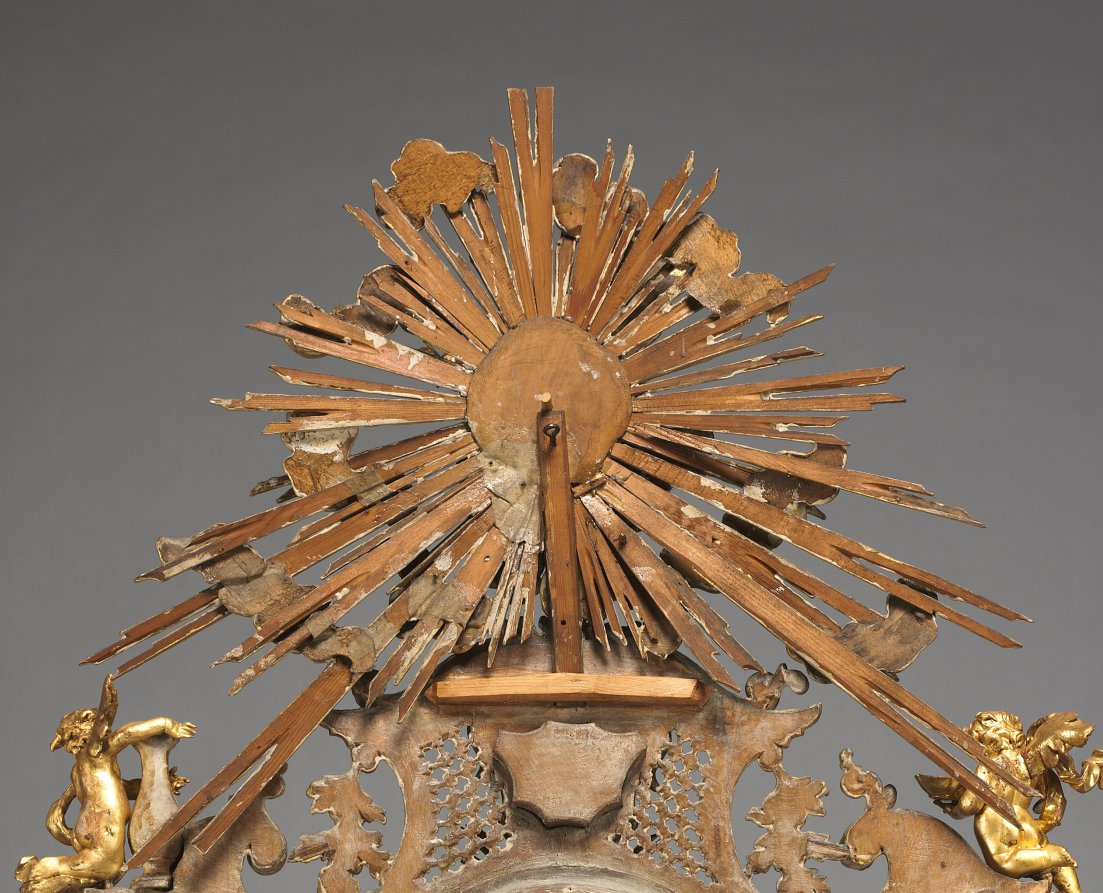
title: Altarpiece with Relics - God the Father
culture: Germany, Bavaria, 18th century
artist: Joseph Matthias Götz (German, 1696–1760)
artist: and Workshop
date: 1735–40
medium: gilded wood, with relics in niches: gilded wood, mother-of-pearl, ebony, red silk, gold wire, seed pearls, rock crystal, pen and ink on paper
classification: Sculpture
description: Götz covers every surface in gold leaf, giving each part of the object equal importance, rather than simply framing a central picture. In this distinctively Central European approach, figural narrative is subordinate to the overall ensemble. Götz designed this object to rest on top of an altar, probably in front of a larger painted or sculpted decorative scheme. The work contains relics seen through the small windows on the perimeter. These small remains of holy figures demonstrate the persistence of a medieval Catholic tradition well into the 1700s.